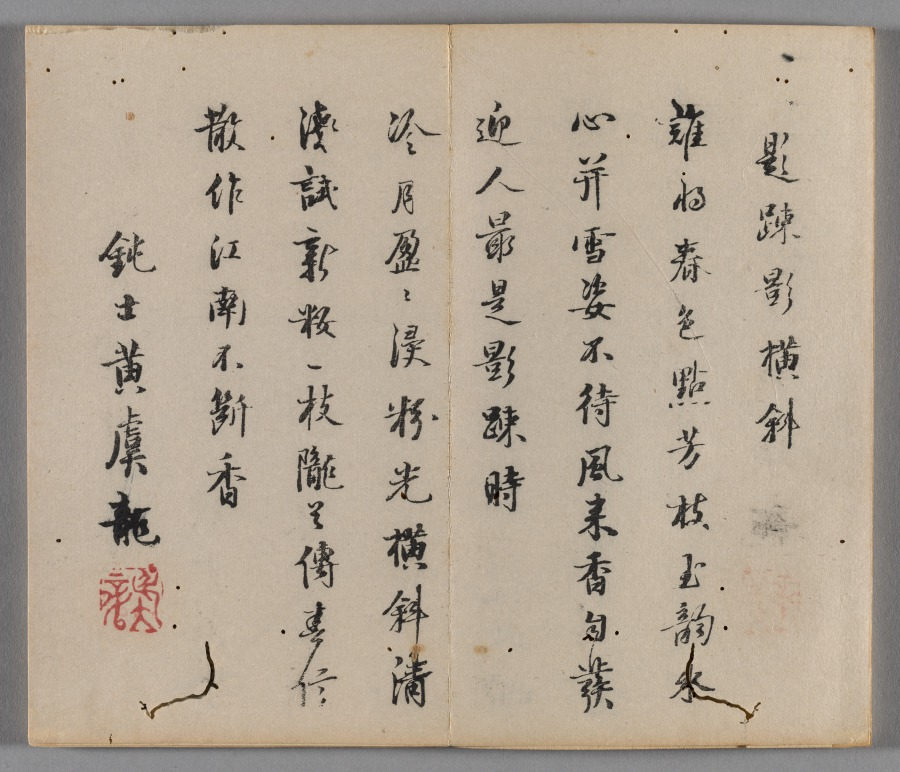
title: Ten Bamboo Studio Painting and Calligraphy Handbook (Shizhuzhai shuhua pu): Plum Blossoms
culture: China, Qing dynasty (1644-1911)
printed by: Hu Zhengyan (Chinese, c. 1584–1674)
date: 1633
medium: Woodblock-printed book; ink and colors on paper; first edition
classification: Print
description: Color printing reached a level of perfection in the early 1600s, as seen in this Ten Bamboo Studio Collection of Calligraphy and Painting and the Mustard Seed Garden Manual of Painting (printed 1679 and 1701). The painterly quality, precision in registering (aligning) the woodblocks, and harmonious colors made them the most successful color print editions in Chinese history. Both editions were printed and compiled in Nanjing, spread nationwide, and had a great impact on the arts in Japan and Korea.